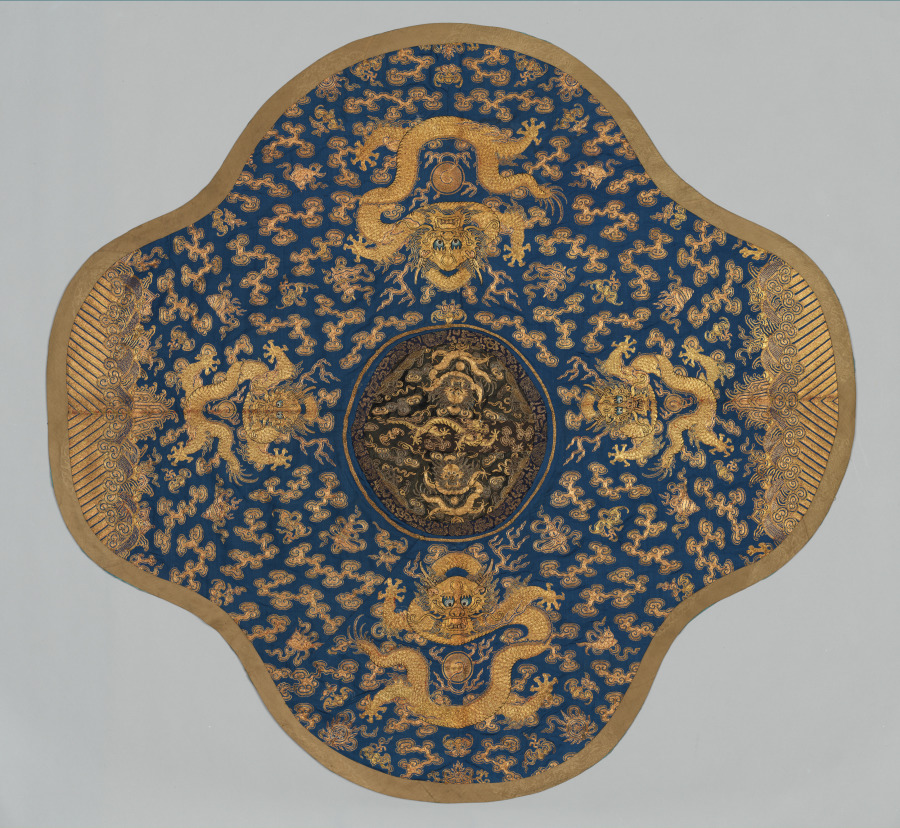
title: Lobed Square Table Cover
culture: China, 19th century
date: 1800s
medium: embroidery, silk and gold thread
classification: Embroidery